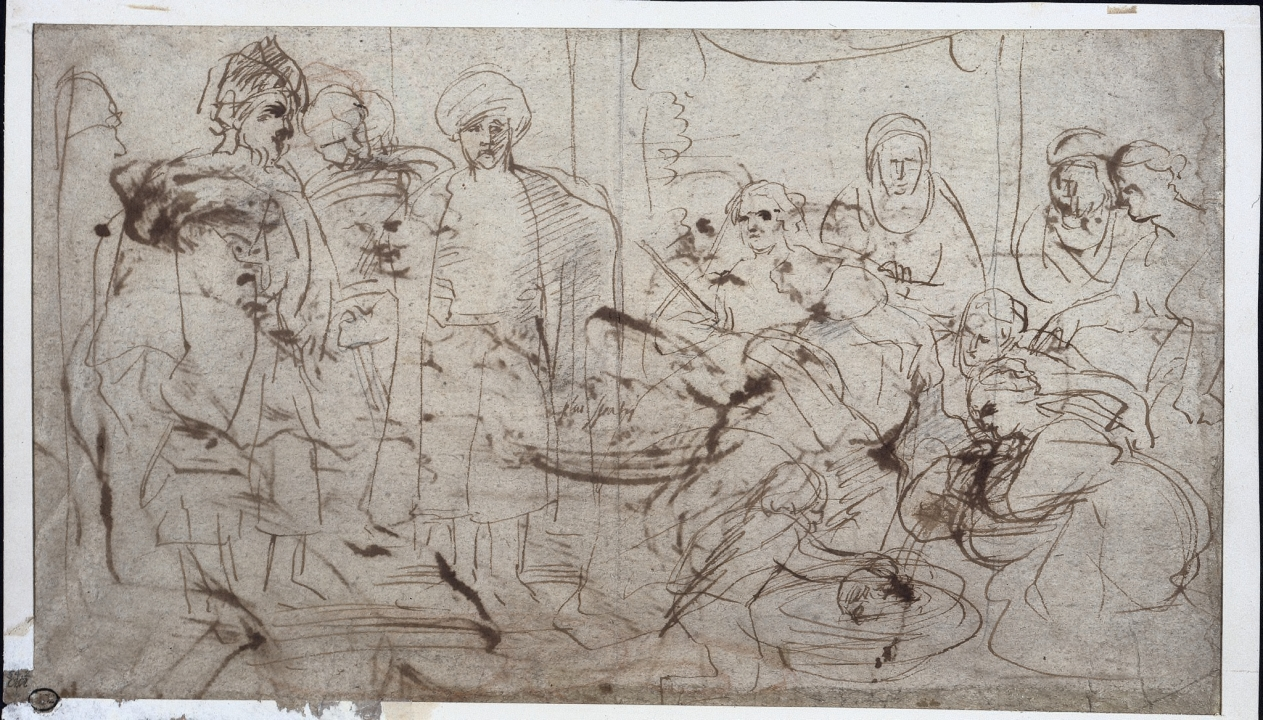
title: Tomyris with the Head of Cyrus (verso)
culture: Flanders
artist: Peter Paul Rubens (Flemish, 1577–1640)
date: c. 1637–38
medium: pen and brown ink, with black and red chalk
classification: Drawing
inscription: by artist, center, in brown ink: plus spatij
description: Peter Paul Rubens had a large studio in Antwerp and used drawing to prepare for large paintings as well as to direct the many pupils who assisted him. Striking in its immediacy, the drawing on the recto of this sheet of paper is a preparatory study for the Feast of Herod painting now at the Scottish National Gallery in Edinburgh. Herod, wearing a large cap and wrapped in a mantle, shrinks back in horror as Salome uncovers a charger that holds the head of Saint John the Baptist. Smiling, Herodias grabs the platter with her left hand and, in a chilling detail, gestures toward the charger with a fork. Rubens wrote what is usually interpreted as “Herodias somewhat higher” at the top of the sheet. The verso of the sheet depicts a sketch for another story featuring a change of fortune at the hands of a vengeful woman, Tomyris with the Head of Cyrus. Rubens made two paintings of the subject (now in Paris and Boston). A rare theme, the story tells of Queen Tomyris who, avenging the death of her son in battle, collects the head of his murderer Cyrus in a bag of human blood. Tomyris is shown seated under a canopy holding a scepter, while the servants before her handle Cyrus’s head. Rubens wrote “plus spatij” (more space) in the center of the sheet.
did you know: The two stories that Rubens depicted on the front and back of this sheet of paper each feature a gruesome death, the result of revenge at the hands of a powerful woman.